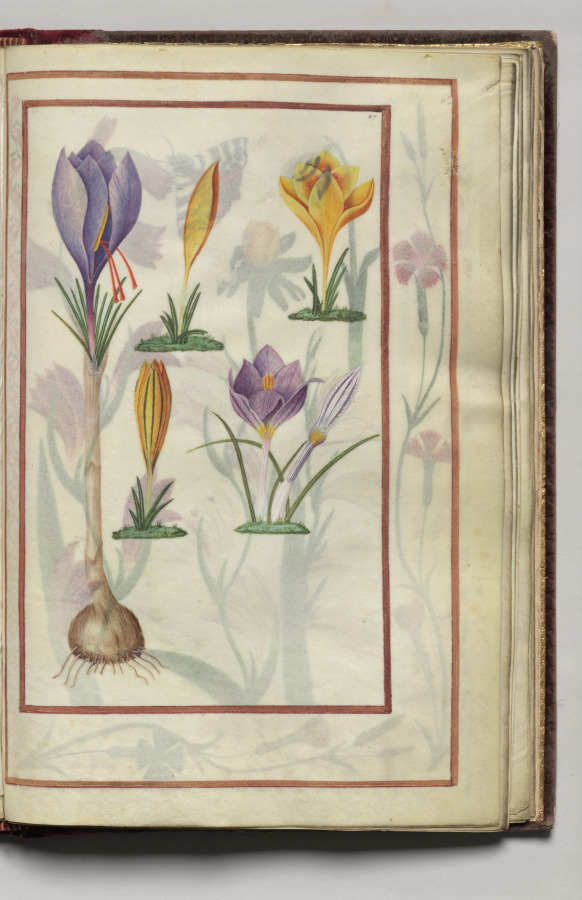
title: Crocus, folio 34 (recto), from Florilegium (A Book of Flower Studies)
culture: France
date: 1608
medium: watercolor, ink, silver, and gold over occasional traces of pencil, on vellum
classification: Bound Volume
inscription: Dated: Poitiers 1608 (on frontispiece) Signed: On frontispiece in black ink, lower right: Van Kuyk Notation on drawing: Frontispiece: in pencil, lower margin: * élève de Van Kessel, peintre flammand (* in pencil also appears in front of Van Kuyk's name).